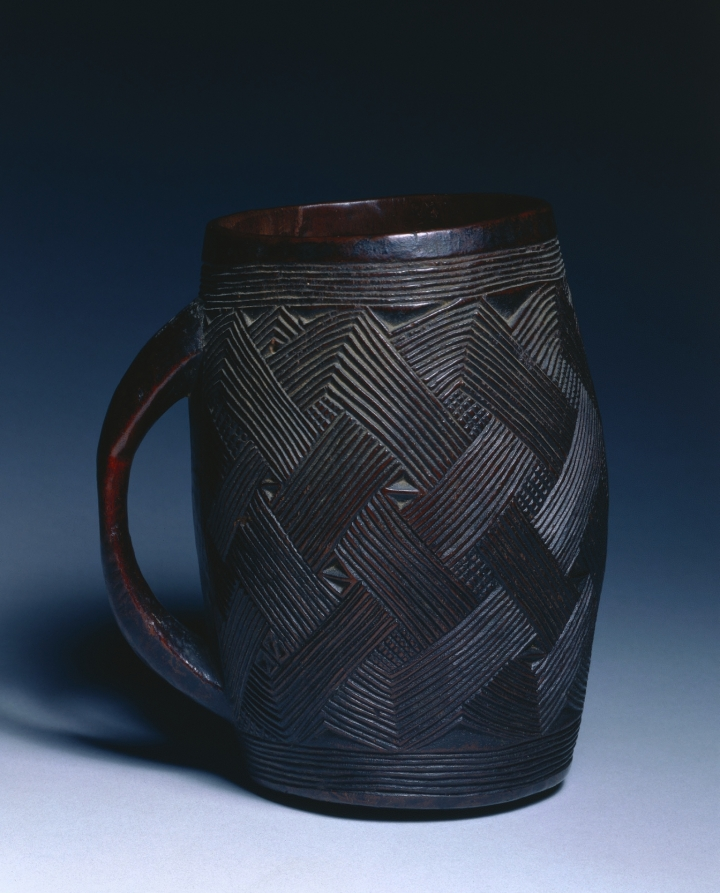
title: Cup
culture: Democratic Republic of the Congo, Kuba, 20th century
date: 1900s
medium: Wood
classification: Vessels